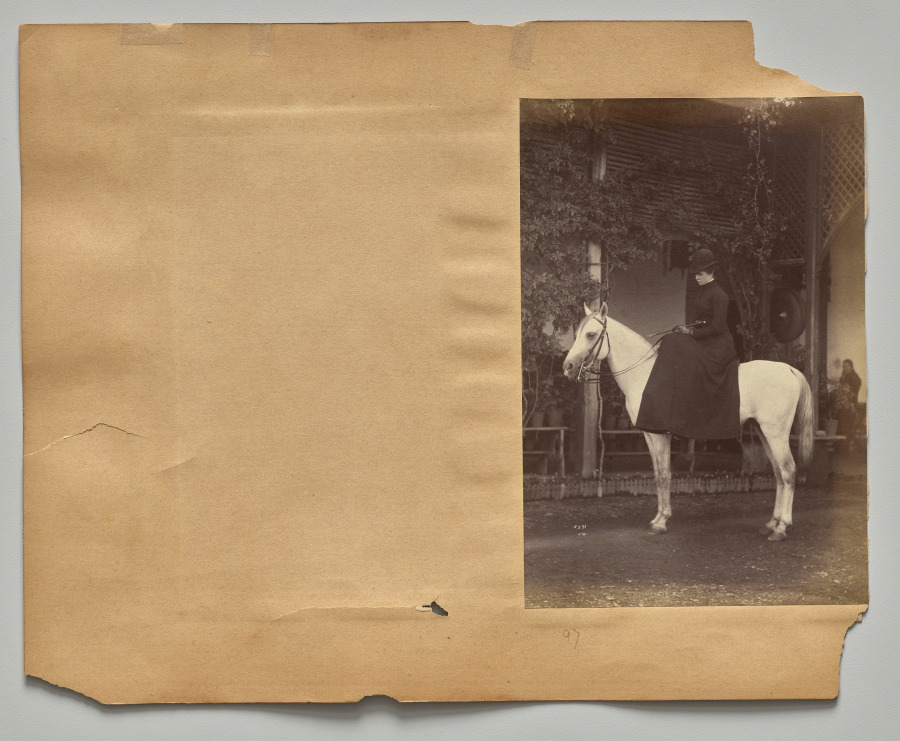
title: Untitled: Woman on horse (verso, right)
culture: India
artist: Raja Deen Dayal (Indian, 1844–1905)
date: c. 1882–87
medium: albumen print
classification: Photograph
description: These photographs are part of an album, now disassembled, of around 105 photographs taken in India between 1885 and summer 1887 that provide glimpses into the lives of the British colonial elite and royal and upper-class Indians. The museum holds another group of 37 pictures from this album (2016.266), which was probably commissioned by a British civil servant visiting or working in India around 1888 as a personal souvenir of his experiences there.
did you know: Raja Deen Dayal is regarded now, and was considered during his lifetime, to be India’s most important 19th-century photographer.